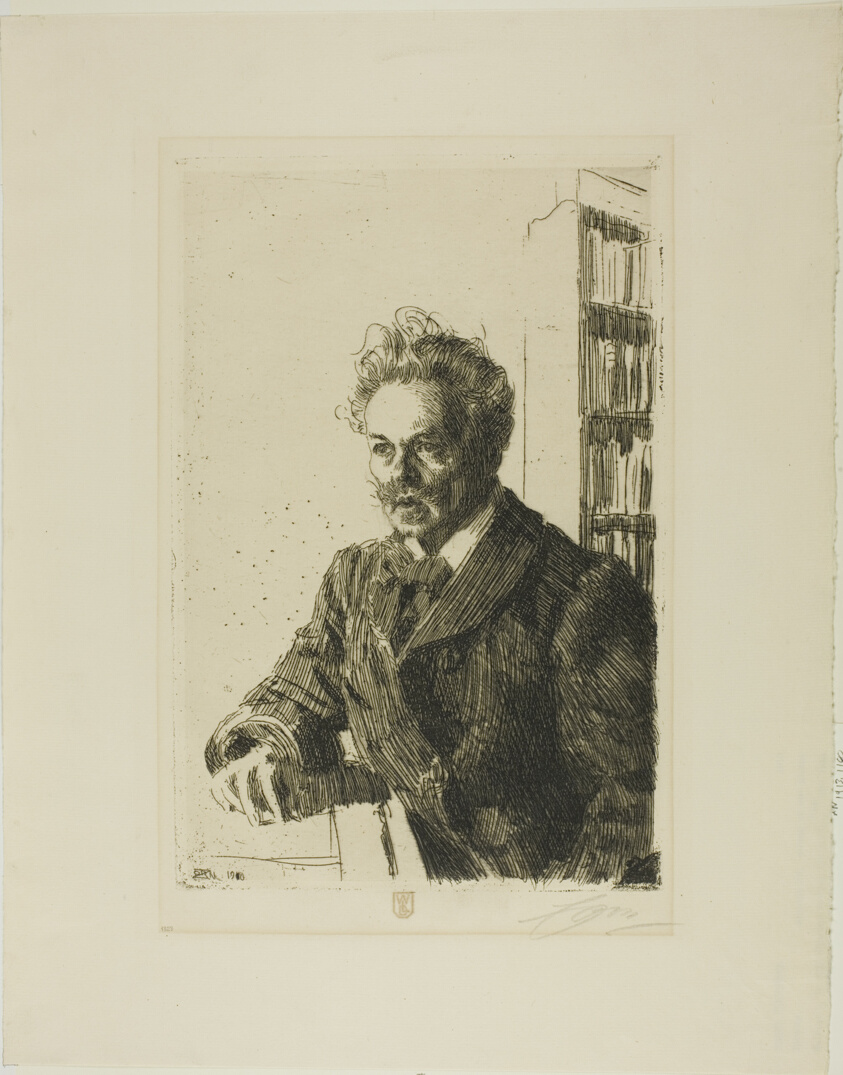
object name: Print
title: August Strindberg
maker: Anders Zorn (Swedish, 1860-1920)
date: 1910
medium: Etching on ivory laid paper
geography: Sweden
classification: etching; print; prints and drawing